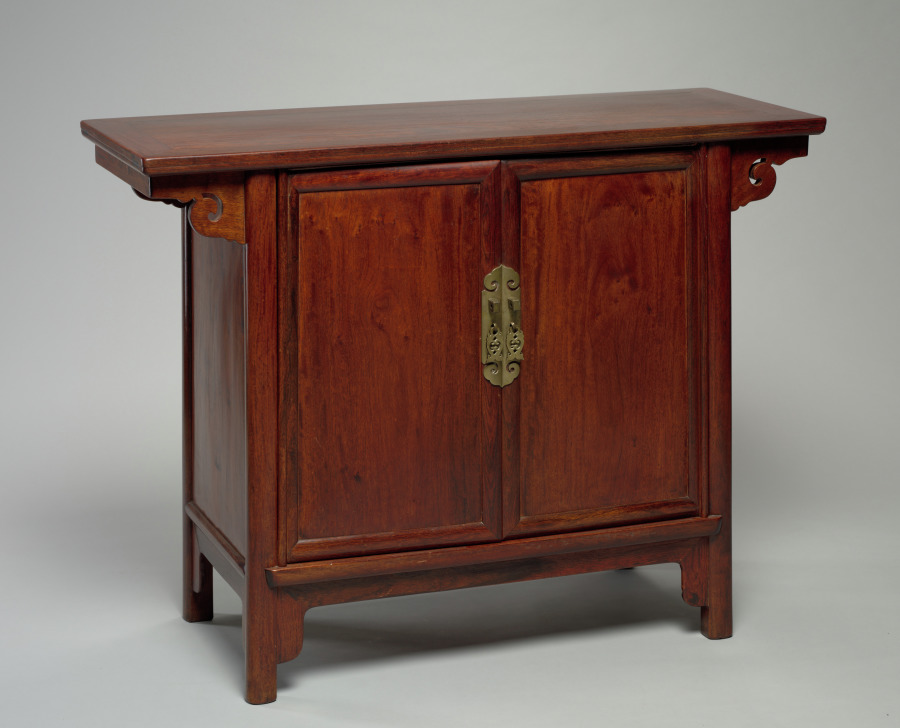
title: Table Top Cupboard: Gui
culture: China, Ming dynasty (1368–1644)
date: 1500s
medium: Rosewood (huanghuali)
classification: Furniture and woodwork